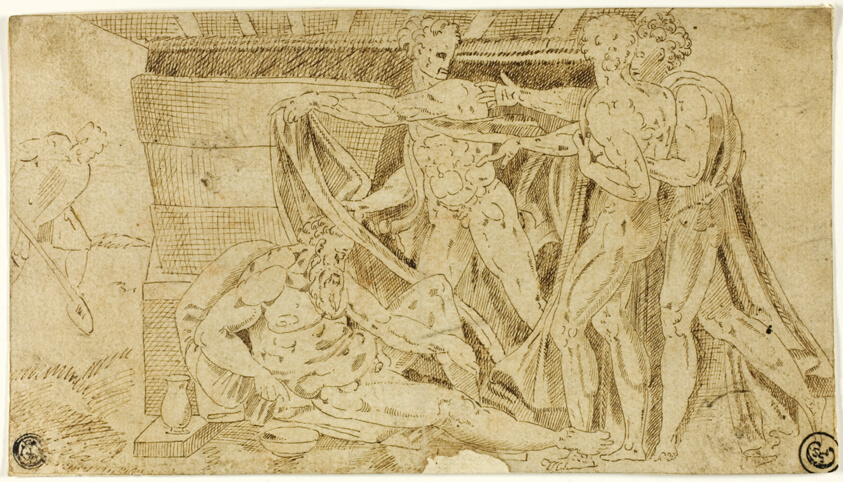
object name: Drawing and Watercolor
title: Drunkenness of Noah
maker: After Michelangelo Buonarroti; Italian, 1475-1564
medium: Pen and brown ink on tan laid paper, laid down on ivory laid paper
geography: Italy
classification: pen and ink drawings; drawings (visual works); prints and drawing